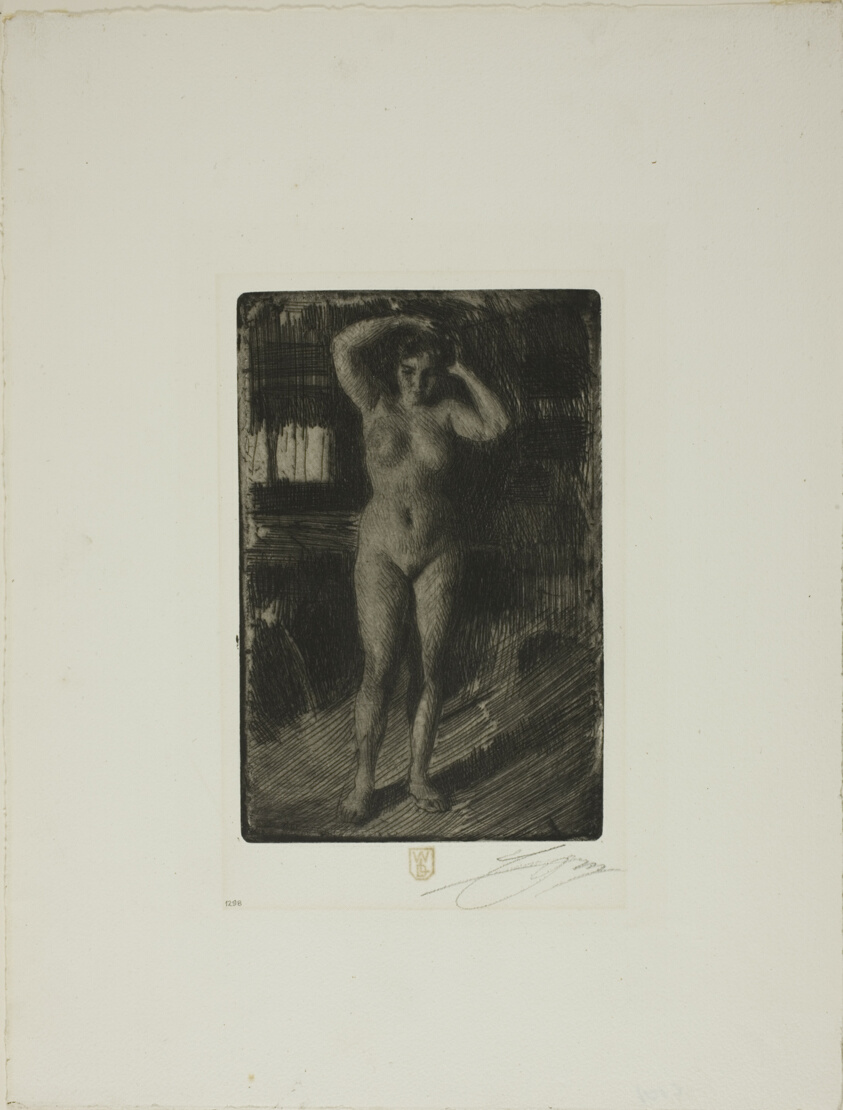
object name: Print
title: Anna Doing Her Hair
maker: Anders Zorn (Swedish, 1860-1920)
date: 1906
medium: Etching on white laid paper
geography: Sweden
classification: etching; print; prints and drawing